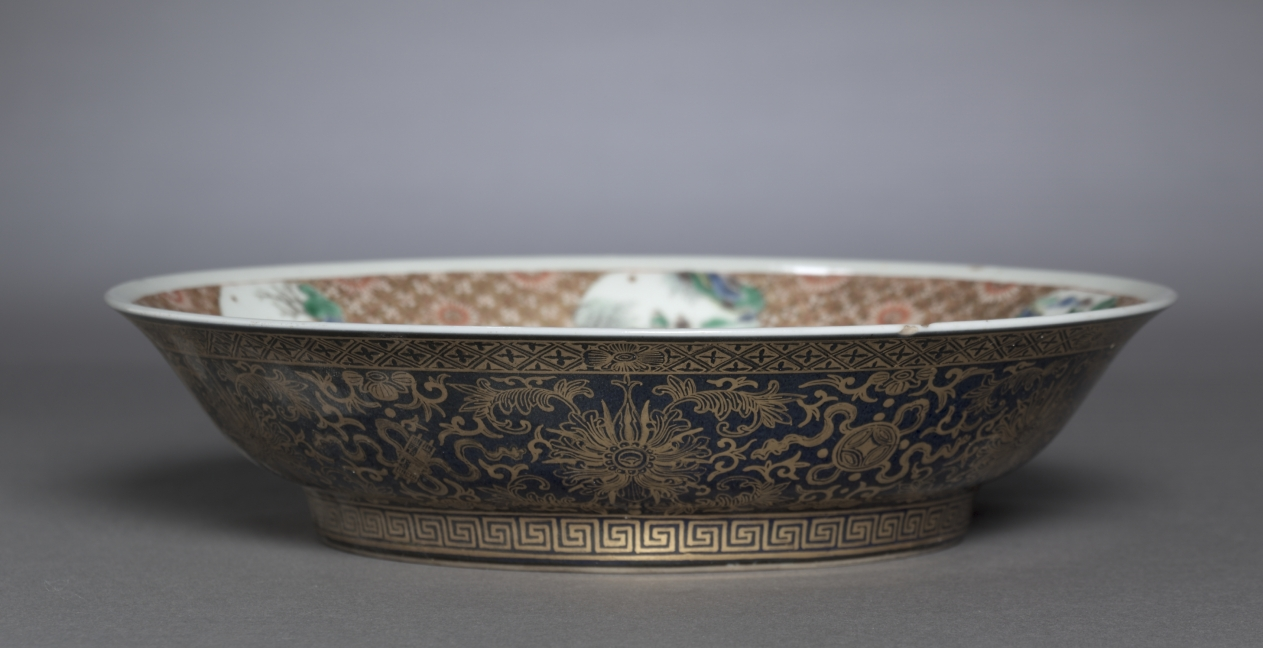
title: Dish with Zhang Guolao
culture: China, Jiangxi province, Jingdezhen kilns, Qing dynasty (1644-1911), Kangxi reign (1662-1722)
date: 1662–1722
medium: porcelain with famille verte overglaze enamel and painted gold decoration (interior) and powder blue glaze with painted decoration (exterior)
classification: Ceramic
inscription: 大清康熙年製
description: Zhang Guolao, featured on this dish, is one of the Eight Immortals and a gifted magician who was believed to know the secret arts to obtain longevity. Typically depicted as an old man and accompanied by his mule, he is the patron saint of artists. His mule is said to be magical; it can be folded up like a piece of paper to fit into a small bag. The central scene is framed by a sumptuously gold-decorated rim showing spaces reserved for landscape scenes in primarily fresh blue and green colors.